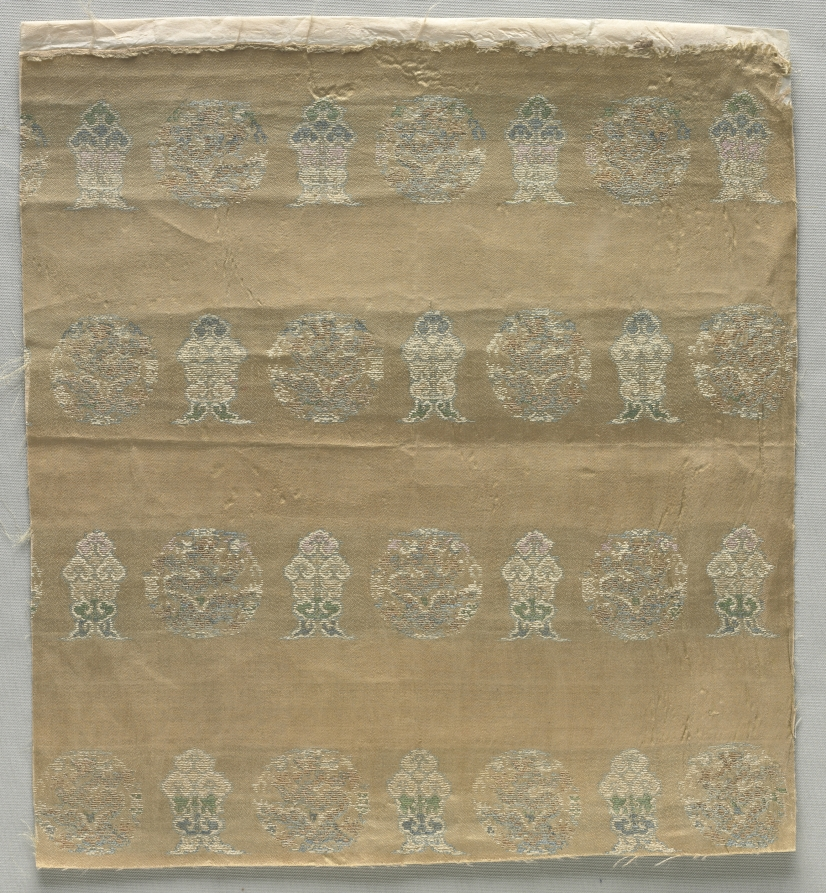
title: Fragment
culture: China, 18th century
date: 1700s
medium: brocaded satin, silk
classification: Textile